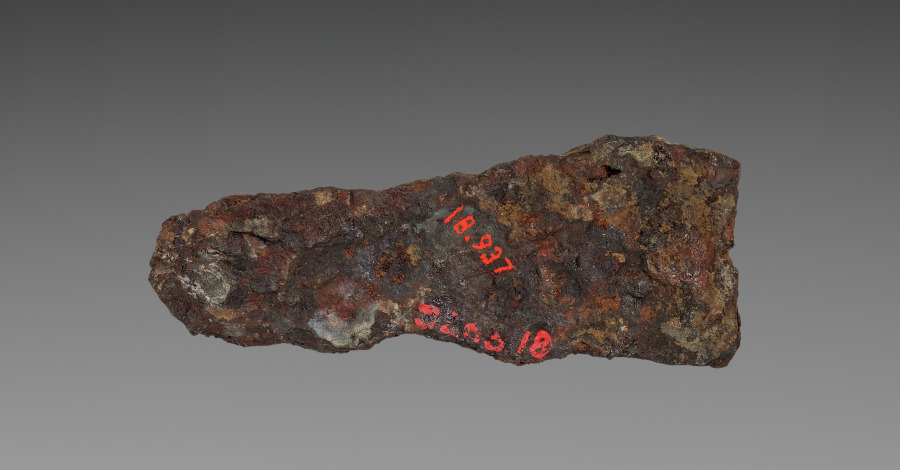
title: Buckle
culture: Merovingian, Burgundian, Migration period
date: 600s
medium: iron with silver overlay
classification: Jewelry